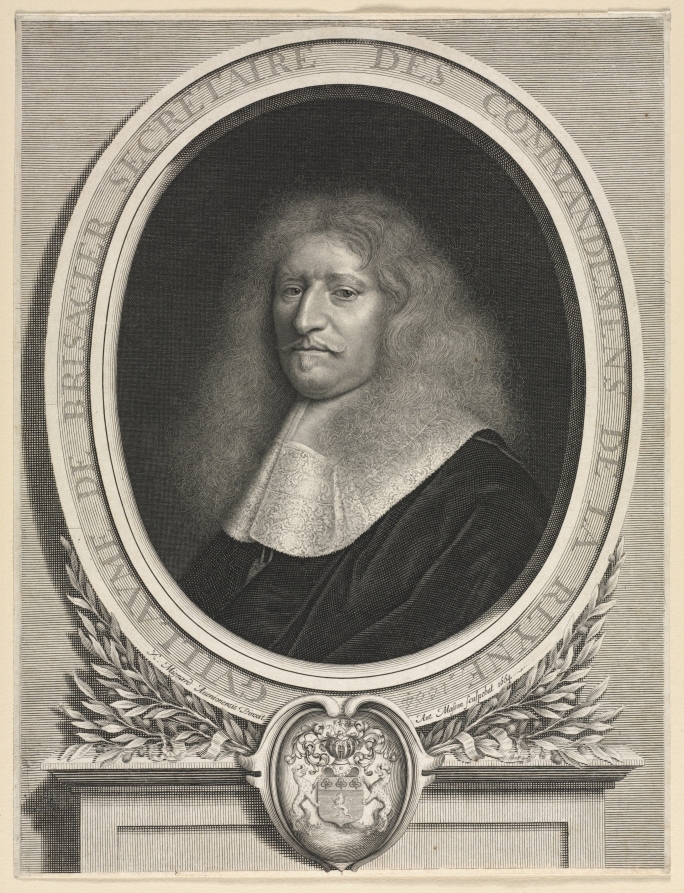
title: Guillaume de Brisacier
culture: France, 17th century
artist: Antoine Masson (French, 1636–1700)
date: 1664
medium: engraving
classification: Print